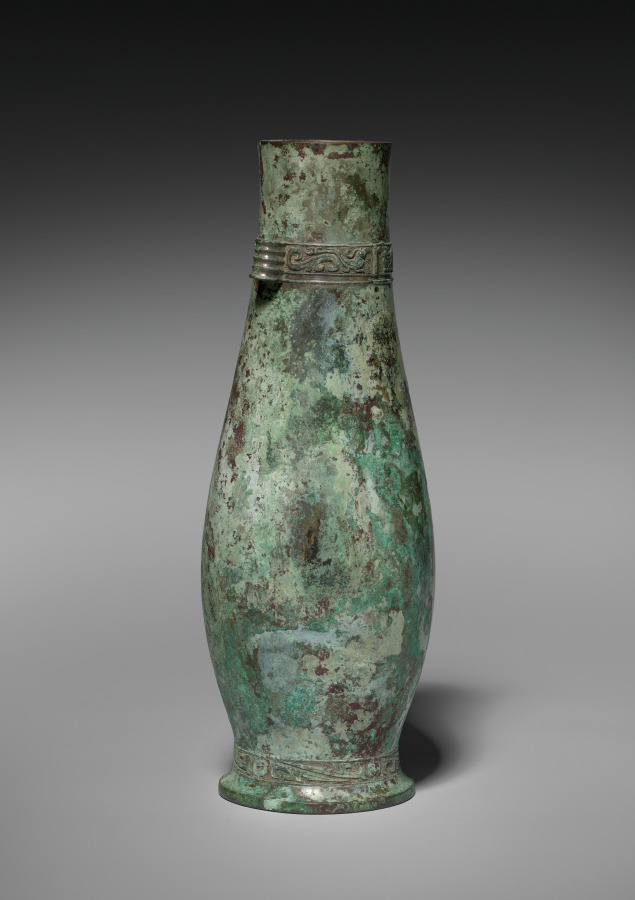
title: Wine Vessel (Hu)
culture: China, Western Zhou dynasty (c. 1046–771 BCE)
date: c. 1000–900 BCE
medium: bronze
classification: Metalwork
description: This tall, slender bronze wine vessel, called a hu, has three bands of ornamentation: one above the foot, one around the neck, and one on the cover. Stylized birds or phoenixes are in the band around the neck, while the band on the cover and foot feature geometric dragons. The dragon and the phoenix may represent the Yin and Yang and would be equally appropriate on a bronze of either secular or religious purposes. When inverted, the cover forms a cup. It likely held liquids like wine at festive banquets or religious ceremonies.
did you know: The cylindrical "handles" suggest that the vessel was carried by a cord.